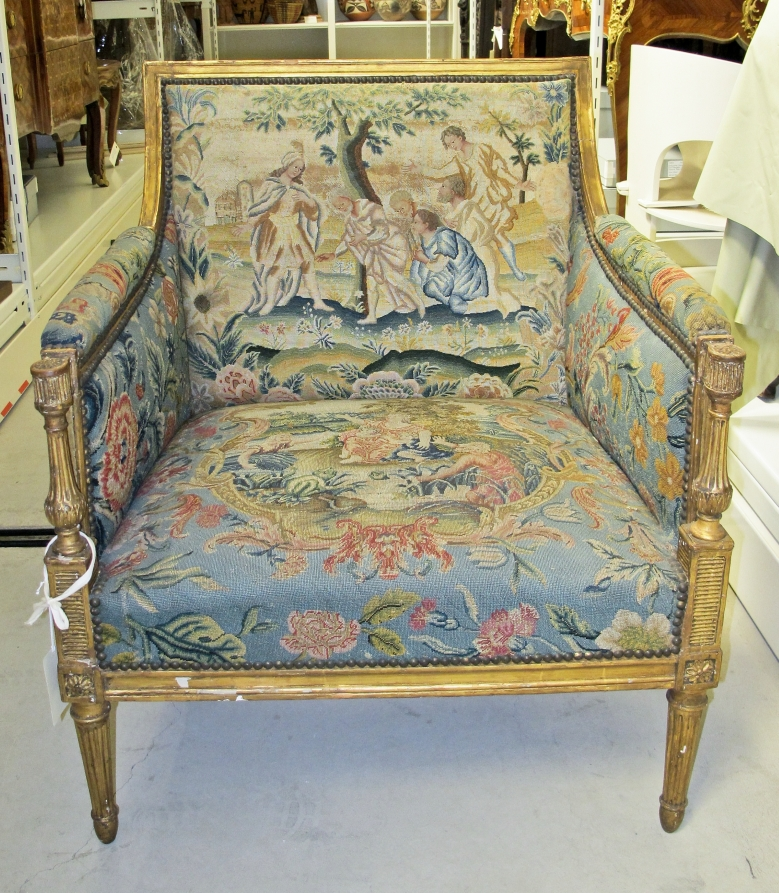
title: Embroidered Back and Seat for Chair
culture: France, back: late 17th century; seat: 18th century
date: late 1600s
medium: petit-point embroidery; wool and silk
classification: Embroidery